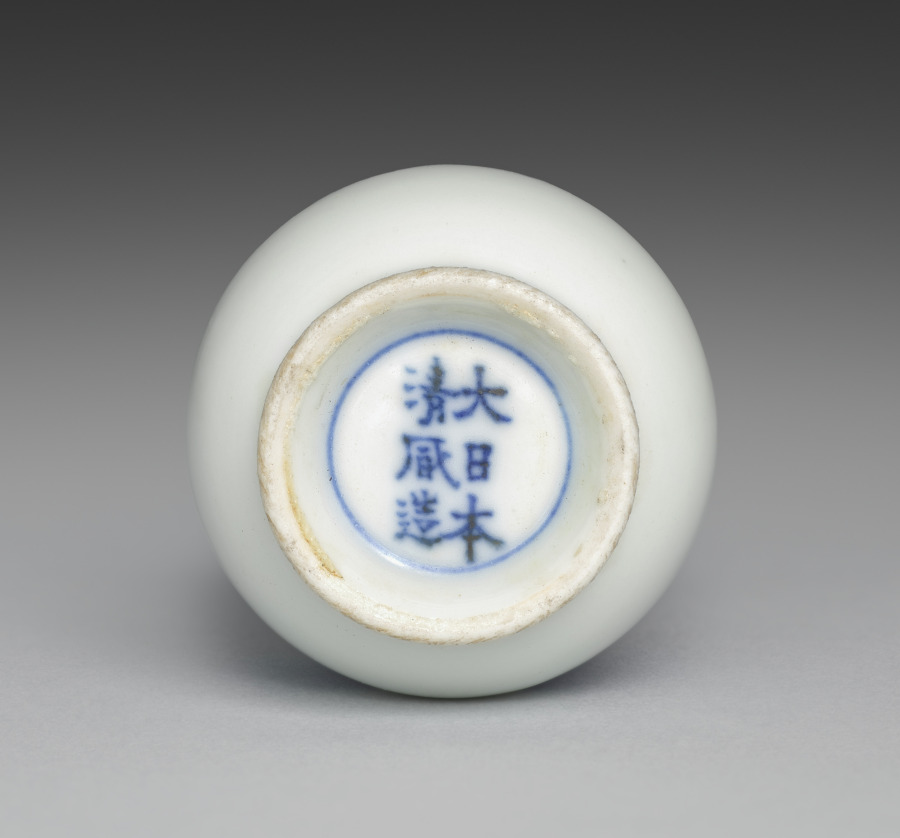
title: Cup from Sake Cups with Dragons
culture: Japan, Meiji period (1868–1912)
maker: Seifū Yohei III (Japanese, 1851–1914)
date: c. 1893–1914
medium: One from a set of six sake cups; porcelain with underglaze blue and iron oxide rims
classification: Ceramic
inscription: 大日本清風造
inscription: 清風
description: Each of these sake cups pictures two backward-looking dragons. The highly stylized creatures resemble jade carvings.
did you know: Seifū Yohei III was inspired by the Chinese mythical animals that were common on porcelain objects made at Jingdezhen in China during the Ming dynasty (1368–1644) and then exported around the world.